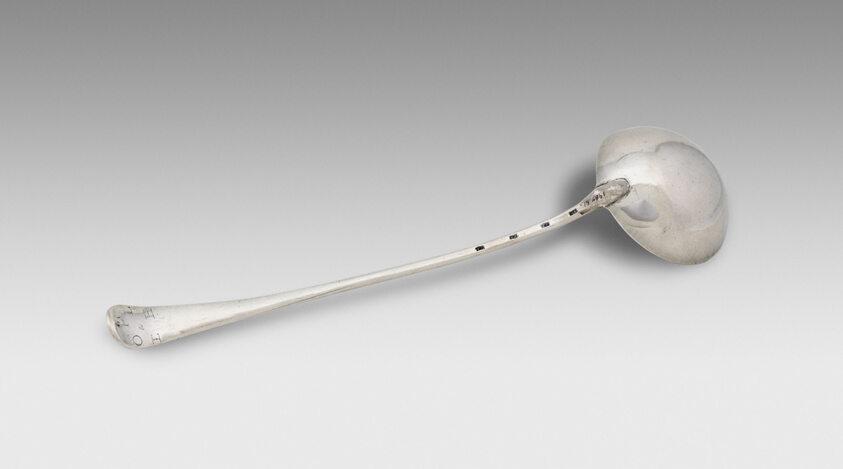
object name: Metalwork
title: Ladle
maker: William Hollingshead; American, active 1754–1785; Philadelphia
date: 1757–67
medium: Silver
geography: Philadelphia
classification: ladle; utensil for serving food; utensil; silver; american decorative arts; american arts; decorative arts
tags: dining, drinking